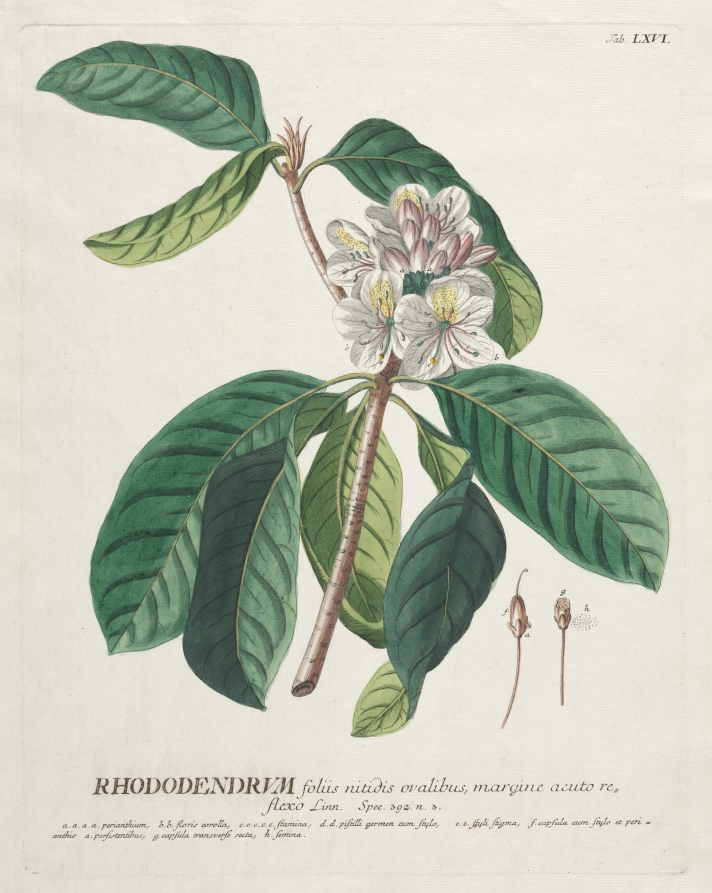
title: Plantae Selectae: No. 66 - Rhododendron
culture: Germany, 18th century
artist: Georg Dionysius Ehret (German, 1708–1770)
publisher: Christopher Jacob Trew (German, 1695–1769)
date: published 1750–73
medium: engraving, hand-colored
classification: Print